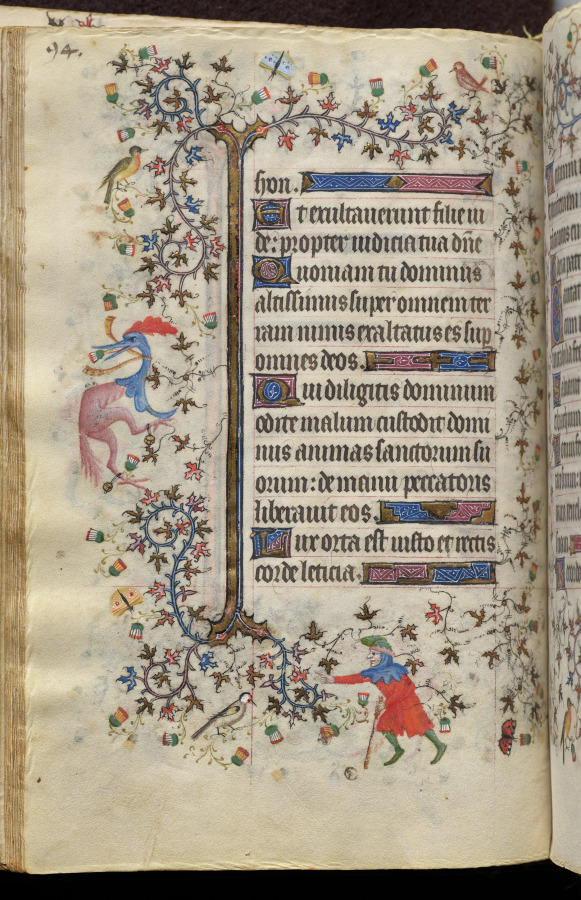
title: Hours of Charles the Noble, King of Navarre (1361-1425): fol. 47v, Text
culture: France, Paris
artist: Master of the Brussels Initials and Associates (French)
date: c. 1405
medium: ink, tempera, and gold on vellum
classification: Bound Volume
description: This precious volume was obviously highly prized by its owner, the French-born King of Navarre, who had his coat of arms painted on no less than twenty folios. Rather than directly commissioning this manuscript from a specific workshop, it seems that Charles the Noble acquired his book of hours -- perhaps ready-made for the luxury market -- while on a trip to Paris in 1404-05. A collaborative effort, six painting styles are evidenced within the pages of this codex, those of two Italians, two Frenchmen, and two Netherlanders. The painter who was responsible for the planning and decoration of the book, and who produced seventeen of the large miniatures, was a Bolognese artist known as the Master of the Brussels Initials. His principal assistant, responsible for most of the borders, was a Florentine who signed his name "Zecho" da Firenze on folio 208 verso.